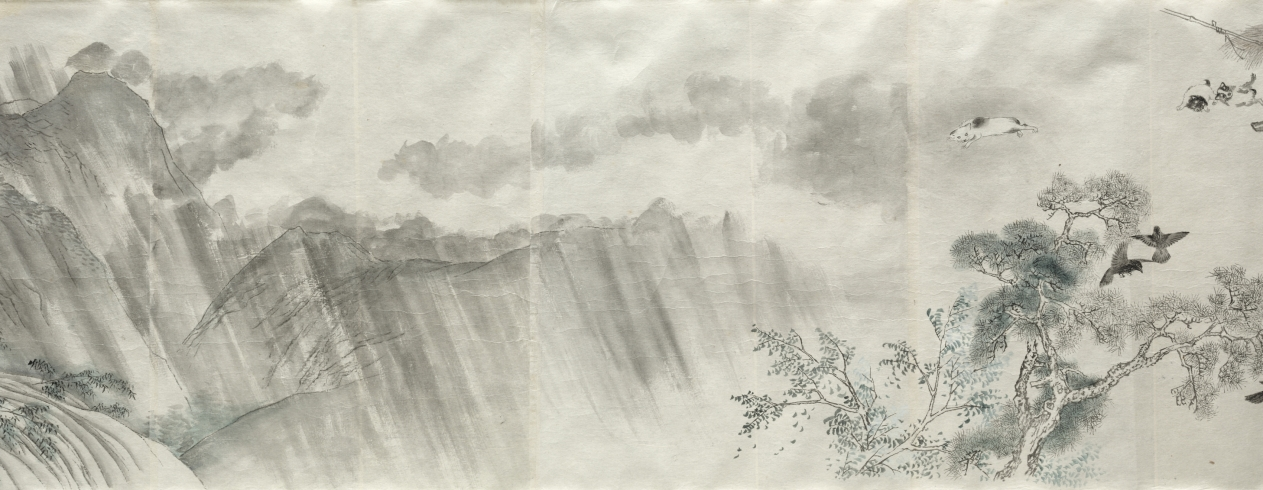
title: Sketch Copy of Natural Disasters, from the Seven Fortunes and Misfortunes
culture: Japan, Edo period (1615–1868) to Meiji period (1868–1912)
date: after 1773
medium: handscroll; ink and color on paper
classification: Painting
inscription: Signed: Gettcho; dated 1773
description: This unmounted handscroll is a copy of the first of a three-scroll set painted by Maruyama Ōkyo (1733–1795) for Buddhist monk Yujō (1723–1773). It depicts people's unfortunate encounters with forces of nature from wind to beasts. Ōkyo's realistic, contemporary imagery was meant to evoke a sense of recognition and empathy in viewers, shocking them into avoidance of possible punishments.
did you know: Notations that appear throughout the scroll indicate colors and other details of the original painting.